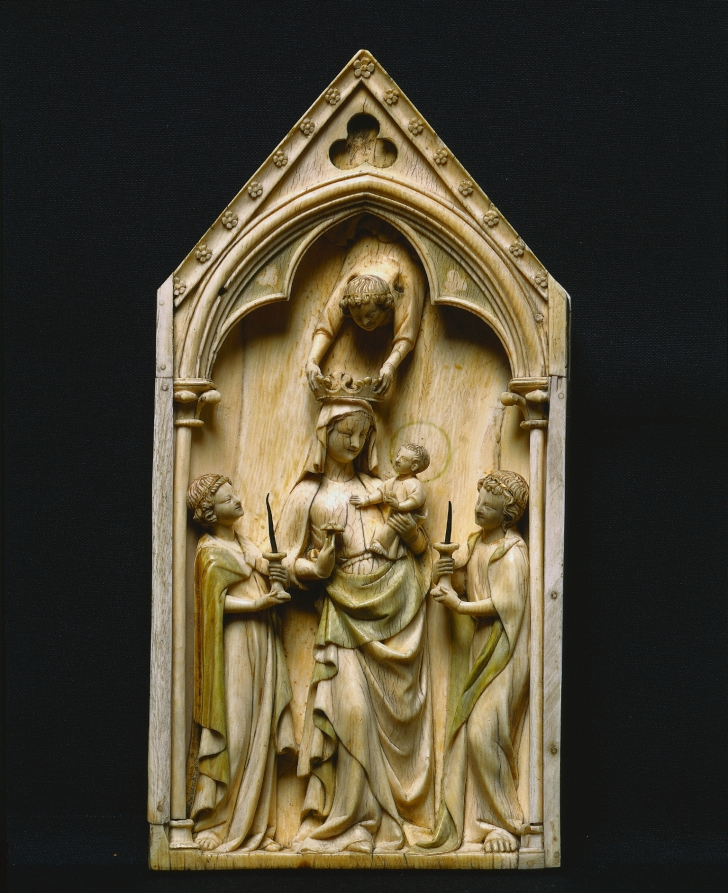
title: Plaque: The Virgin and Child with Angels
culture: France, Paris, Gothic period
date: c. 1320–1330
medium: ivory, traces of paint and gilding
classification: Ivory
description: This plaque once formed the center of an ivory triptych, a devotional object consisting of three panels hinged together. While two standing angels with candlesticks flank the enthroned Virgin on either side, a third angel descends from above to crown the Virgin as Queen of Heaven.